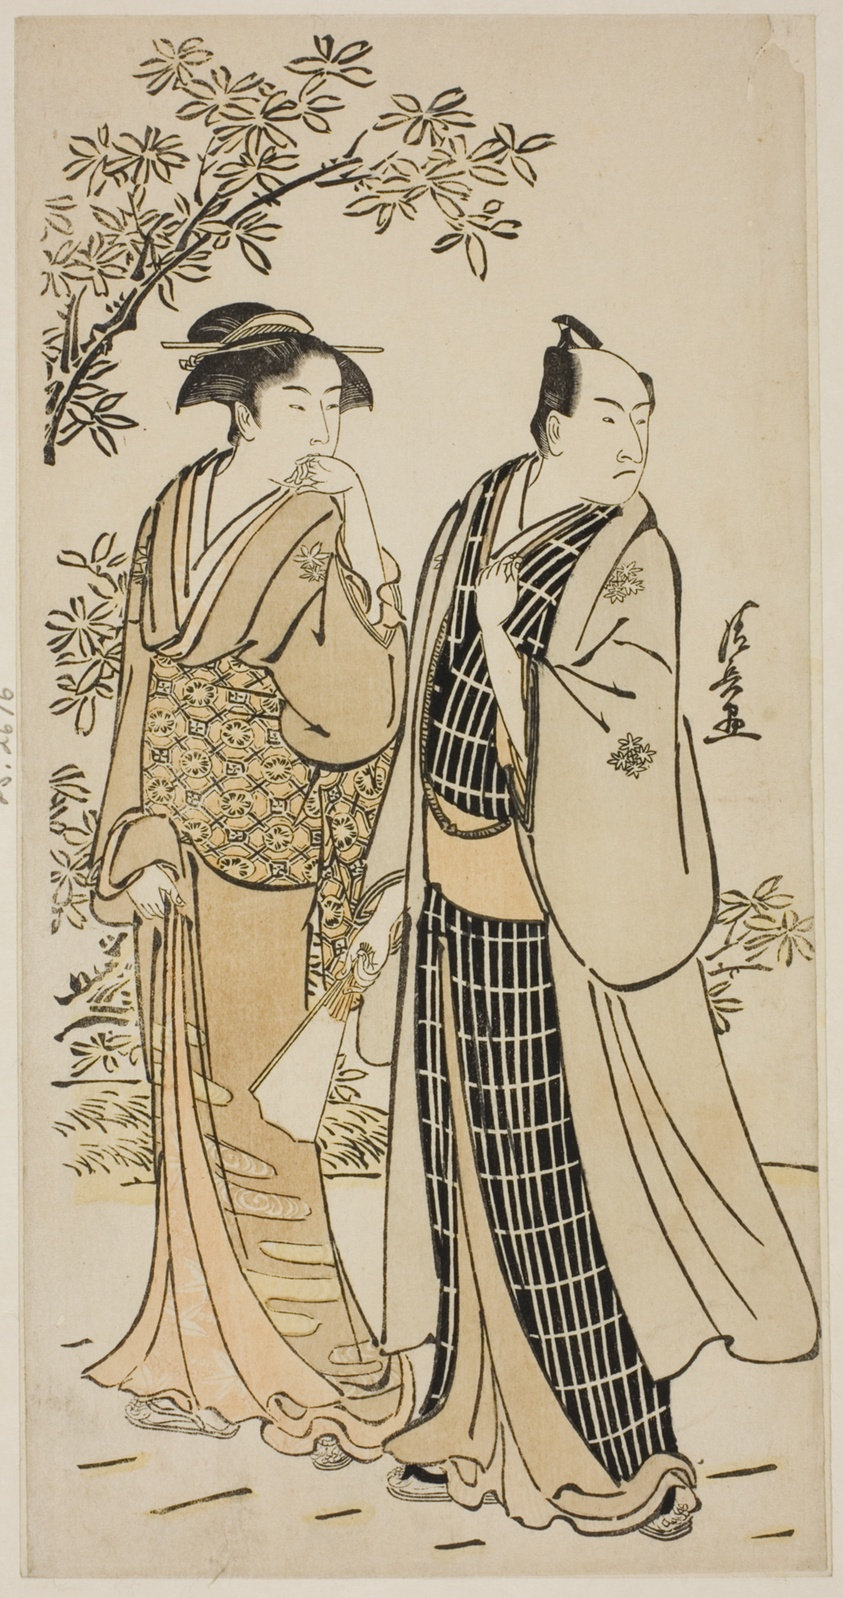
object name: Print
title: The Actor Ichikawa Monnosuke II and his wife, from an untitled series of prints showing Actors in private life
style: Japanese (culture or style)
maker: Torii Kiyonaga (Japanese, 1752-1815)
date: c. 1783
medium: Color woodblock print; hosoban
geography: Japan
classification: woodblock print; print; asian art